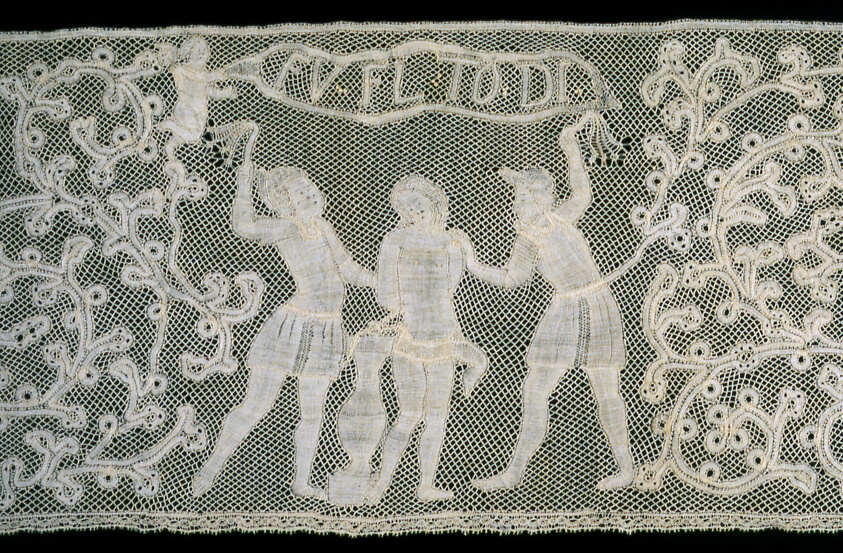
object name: Textile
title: Border (From an Altar Cloth)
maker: Italy, Milan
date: 1725/75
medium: Linen, bobbin part lace; embellished with glass beads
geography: Milan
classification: textile; lace - bobbin